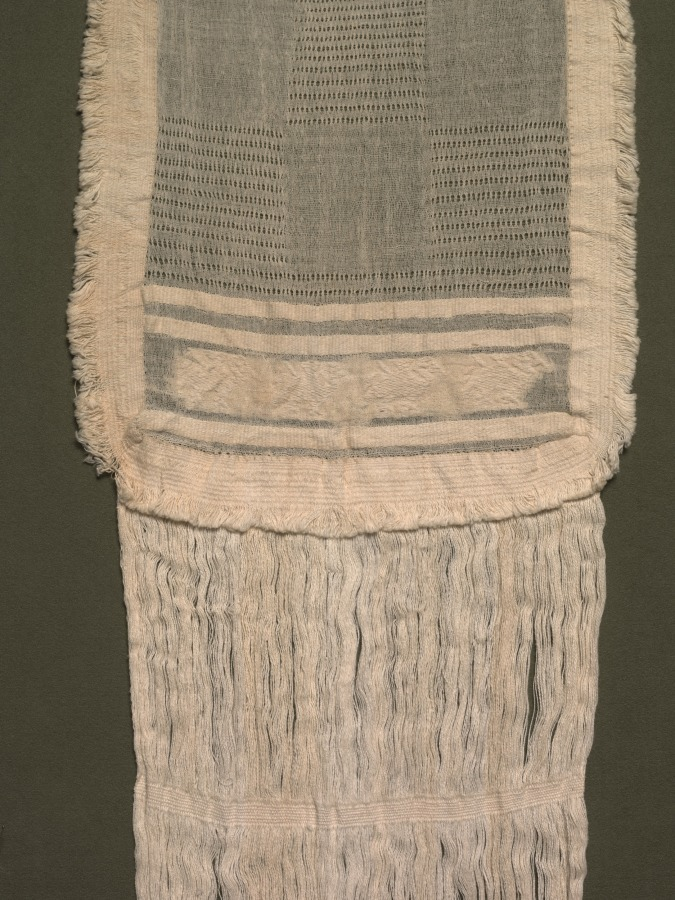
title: Turban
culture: Peru, North Coast, Chimú style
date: 1485–1640 (radiocarbon date, 95.4% probability)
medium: Cotton; plain weave, brocaded and complex alternating gauze with 5 shots of plain weave between gauze shots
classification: Garment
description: Chimú garments like this one consist of a large, rectangular central section—here measuring some 65 inches by 50 inches—with decorated tabs stitched to two opposite corners. Such garments probably were worn as turbans but we do not understand exactly how. For the purpose of display, the plain central section of this example has been folded to form a wide band, with the tabs arranged on either side.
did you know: The white cotton yarns used to make this textile are only 0.1 to 0.2 millimeters in diameter.